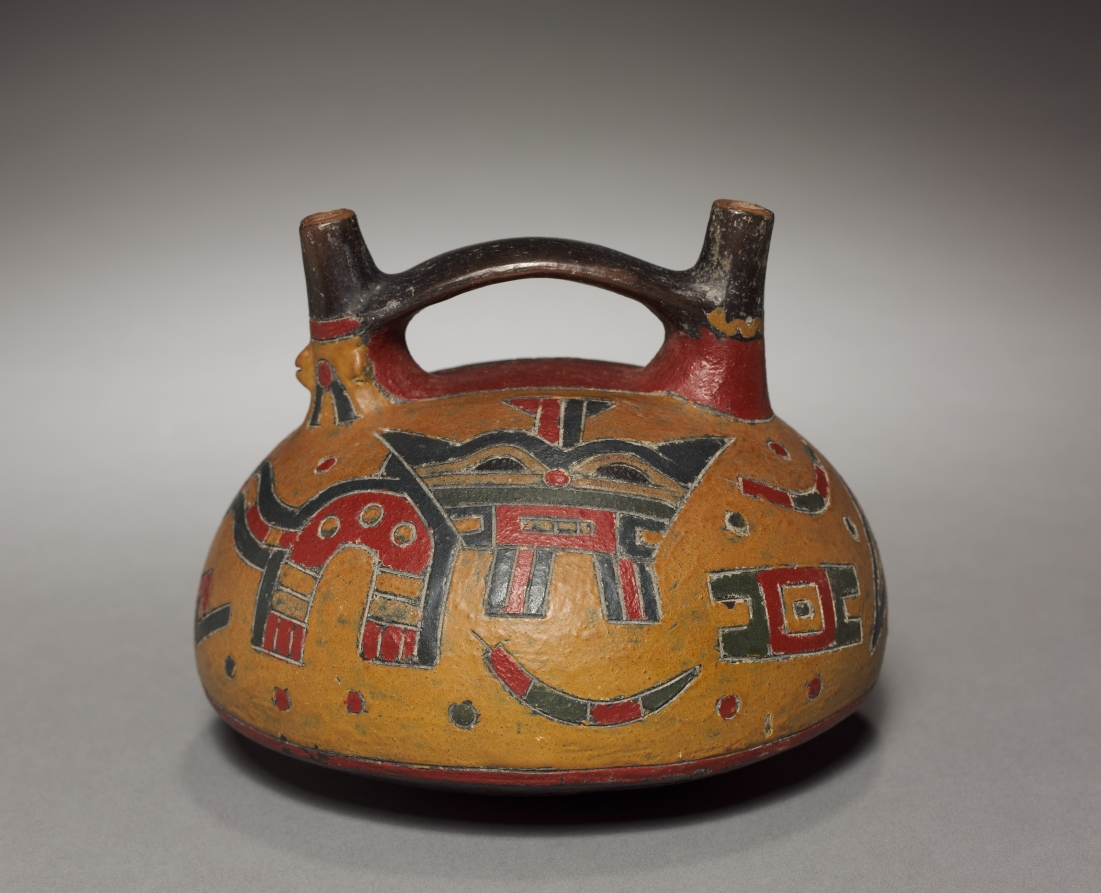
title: Vessel with Feline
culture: Peru, South Coast, Paracas (Cavernas) style (700 BCE–1 CE)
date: 700 BCE–1 CE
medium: earthenware, resin-based paint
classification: Ceramic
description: Little is known of the meaning of the beautifully abstracted felines so often incised on Paracas ceramics. The designs achieve much of their complexity through color applied as resin-based paint after the vessel was fired in a smoky atmosphere that blackened its surface. Two spouts joined by a bridge appear on many fine South Coast ceramics. The form probably had meaning, now lost.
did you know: Small, wild, reclusive felines, pampas cats live on the margins of agricultural fields, where they prey on rodents and other pests that are a farmer’s bane